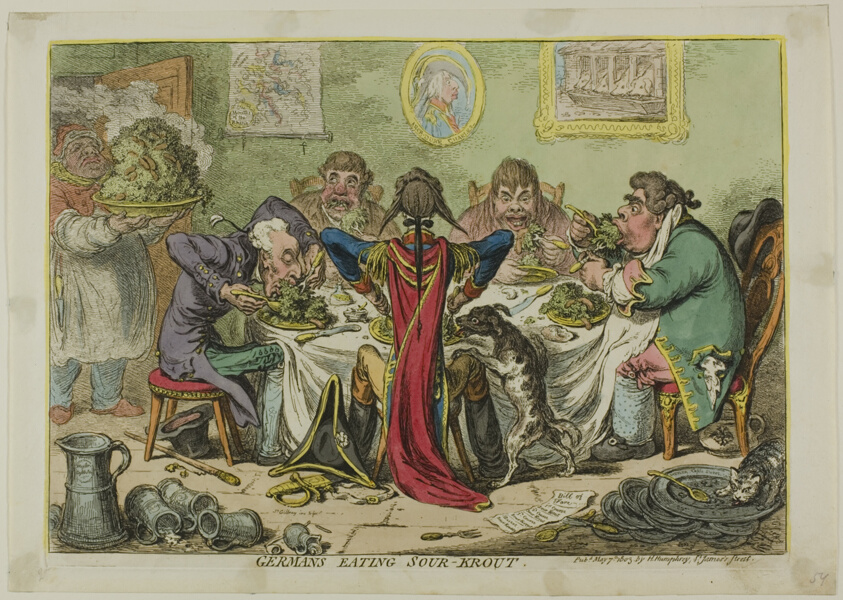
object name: Print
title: Germans Eating Sour-Krout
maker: James Gillray (English, 1756-1815); published by Hannah Humphrey (English, c. 1745-1818)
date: published May 7, 1803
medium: Hand-colored etching on paper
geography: England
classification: etching; print; prints and drawing